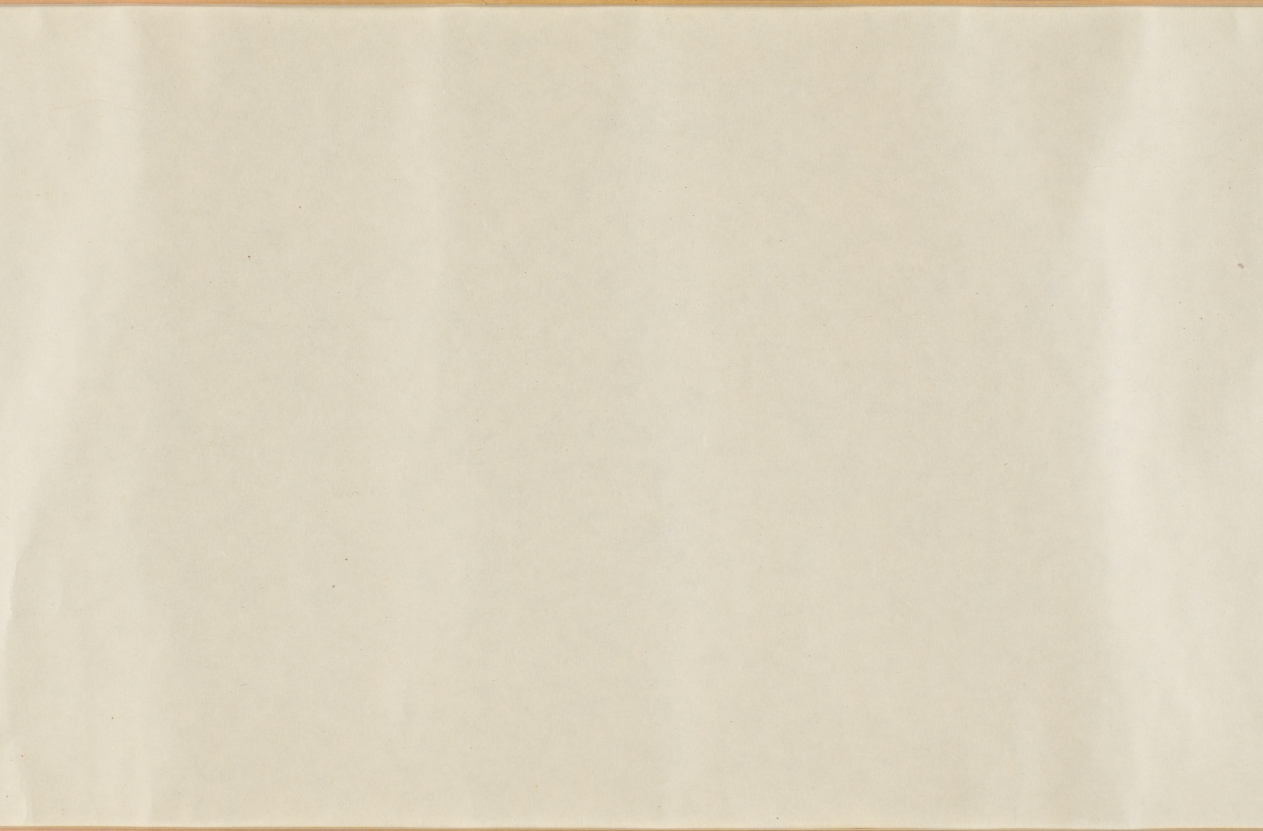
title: Selections from the New Collection of Japanese Poems from Ancient and Modern Times (Shinkokin wakashū) with Printed Designs of Chinese Lions and Crab Finger Grass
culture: Japan, Edo period (1615–1868)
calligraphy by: Hon'ami Kōetsu (Japanese, 1558–1637)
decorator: Tawaraya Sōtatsu (Japanese, c. 1570–c. 1640)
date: early 1600s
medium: handscroll; ink, gold, and silver on paper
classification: Calligraphy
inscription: Seal: 光悦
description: Hon’ami Kōetsu was a calligrapher and craftsman who frequently collaborated with the painter Tawaraya Sōtatsu, considered the first master of the Rinpa school. Kōetsu brushed seven poems from the autumn section of a poetry anthology onto dyed paper with motifs designed and printed in gold and silver by Sōtatsu.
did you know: Before becoming a master painter of screens, Tawaraya Sōtatsu painted fans.